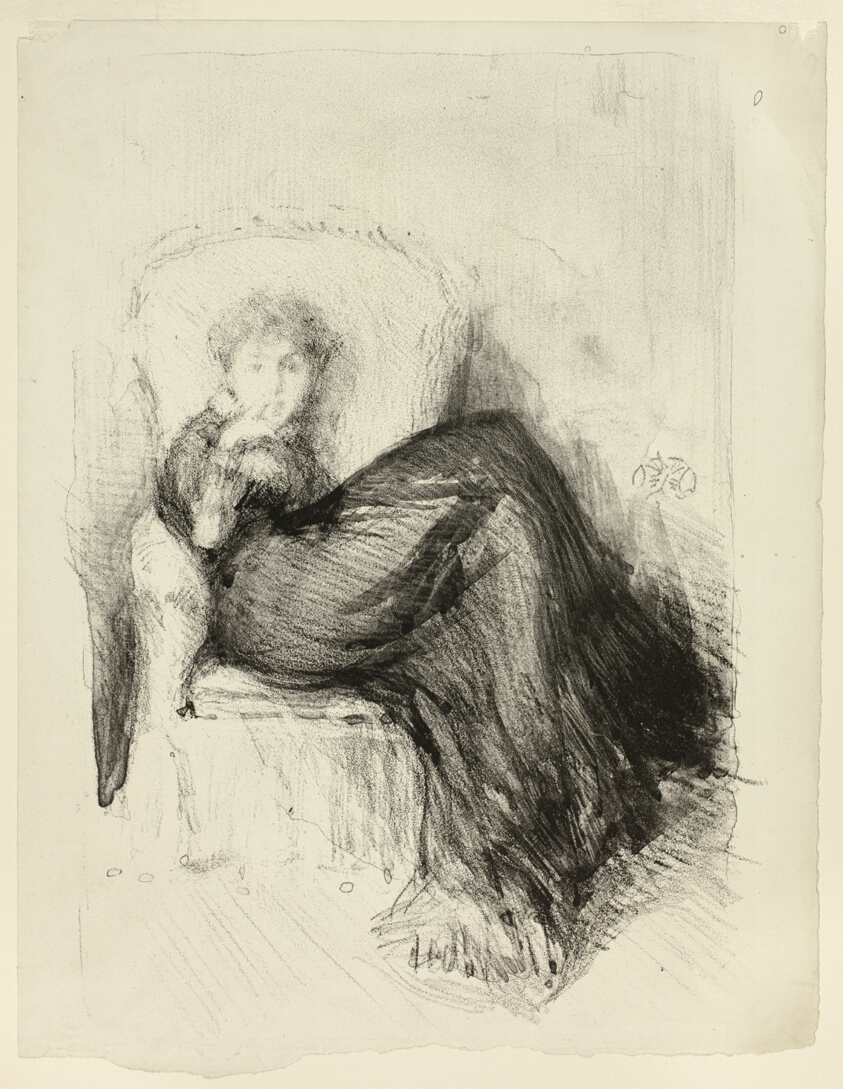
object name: Print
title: Study: Maud Seated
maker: James McNeill Whistler (American, 1834-1903)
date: 1878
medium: Lithotint with scraping and roulette in black ink on ivory wove proofing paper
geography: United States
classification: lithotint; lithograph; print; prints and drawing; paper